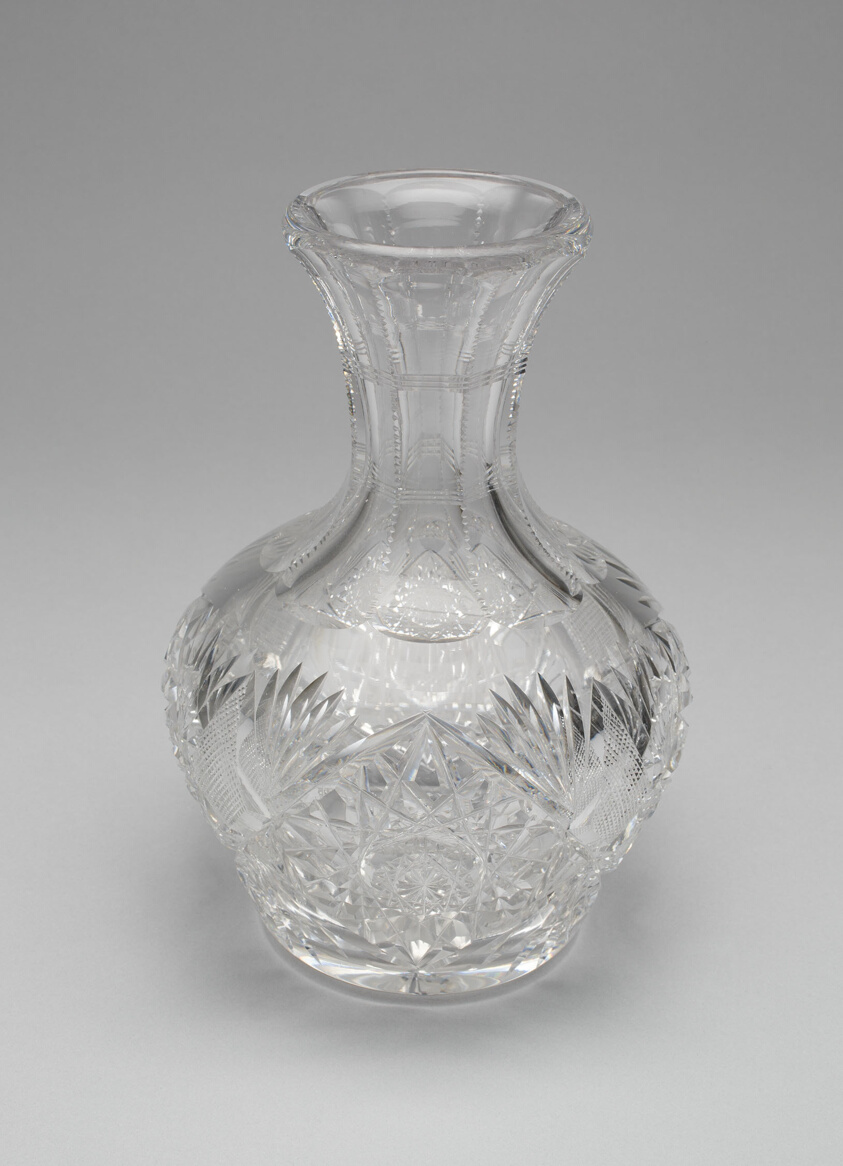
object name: Glass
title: Carafe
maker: Artist unknown (American, 19th–20th century)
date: c. 1902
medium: Glass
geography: United States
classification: bottle; glass; american decorative arts; american arts; decorative arts